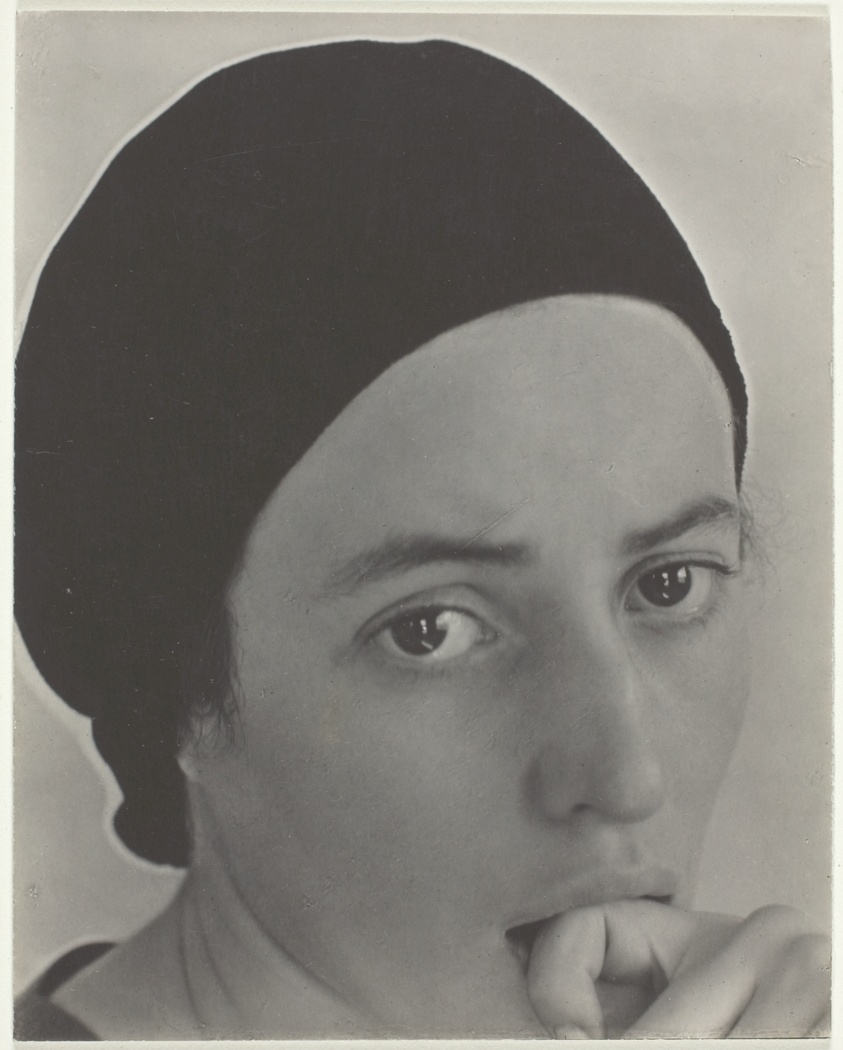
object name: Photograph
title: Dorothy Norman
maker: Alfred Stieglitz (American, 1864–1946)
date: c. 1931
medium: Gelatin silver print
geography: United States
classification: gelatin silver (developing-out-paper) pr; photographic process; photography; photograph